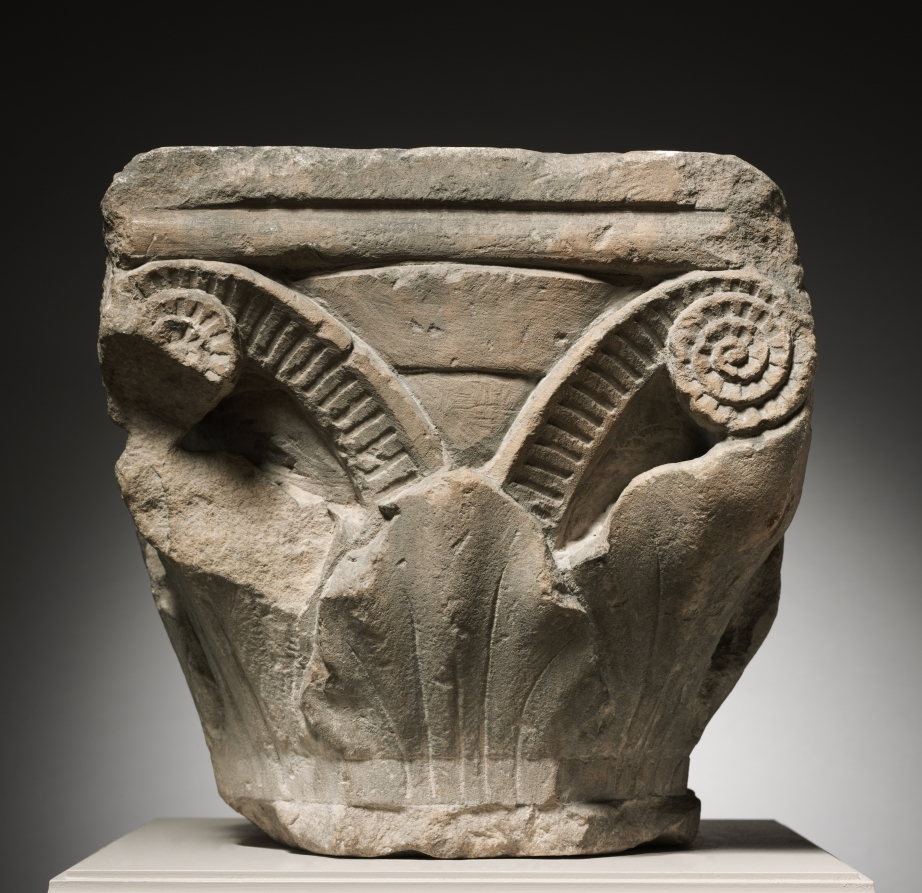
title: Capital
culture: Italy, Migration period, 8th-9th Century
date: 700s-800s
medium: marble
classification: Sculpture